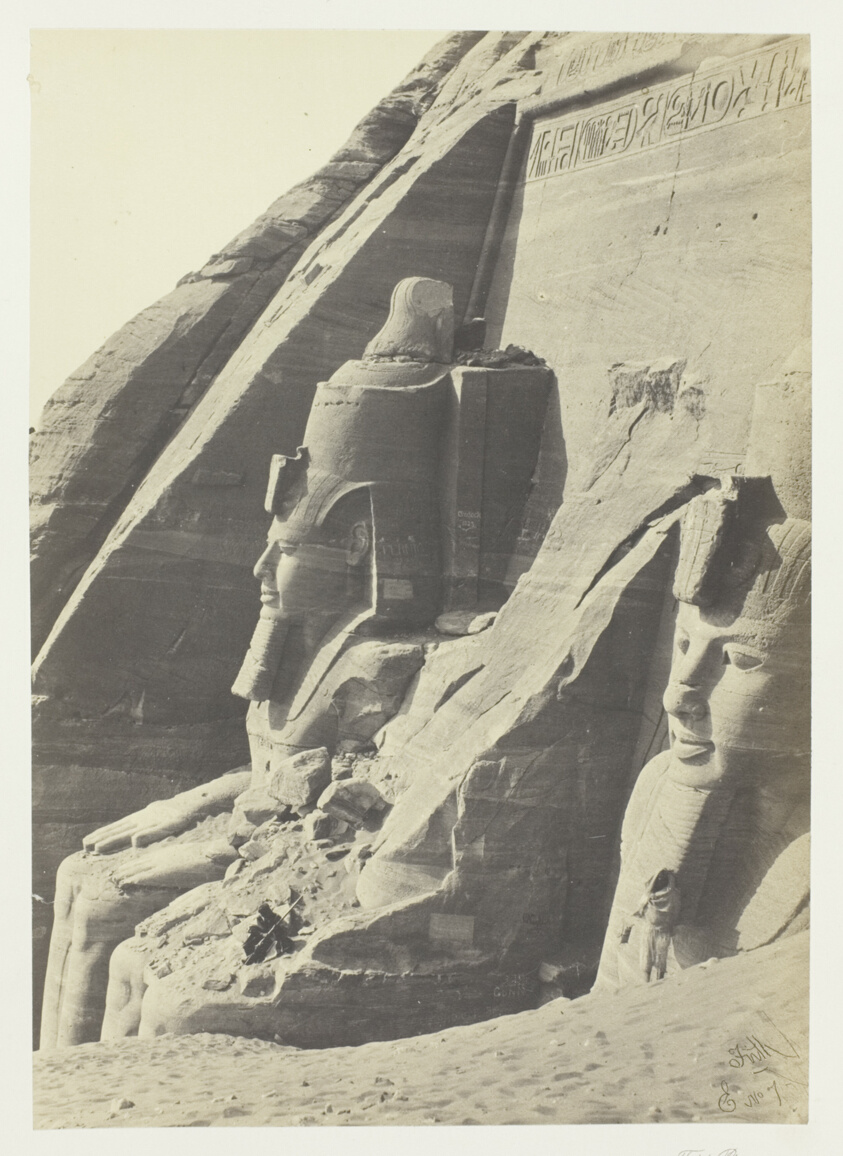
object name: Photograph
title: Abou Simbel, Nubia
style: 19th century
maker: Francis Frith (English, 1822–1898)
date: 1857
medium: Albumen print, pl. 15 from the album "Egypt and Palestine, Volume I" (1858)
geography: England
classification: photograph; albumen silver print; photography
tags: Collected by Hugh Edwards, Egypt and Palestine